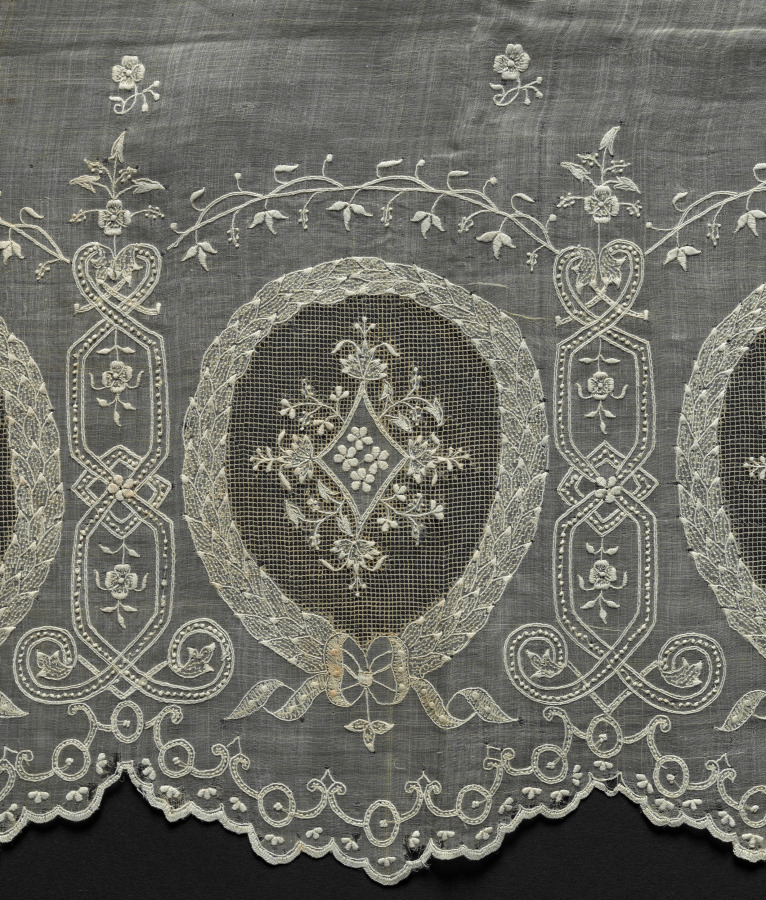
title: Lace Border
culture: Philippines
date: 1800s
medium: Plain weave piña cloth: needle lace and embroidery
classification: Embroidery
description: This rectangular textile consists of a fine, translucent ground fabric with a scattered pattern of small embroidered floral sprigs. The ground shows areas of loss, small holes, fraying, and darkening, while the embroidered and openwork areas remain largely intact.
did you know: This textile may be a fragment from the sleeves of a baro-camisa garment.